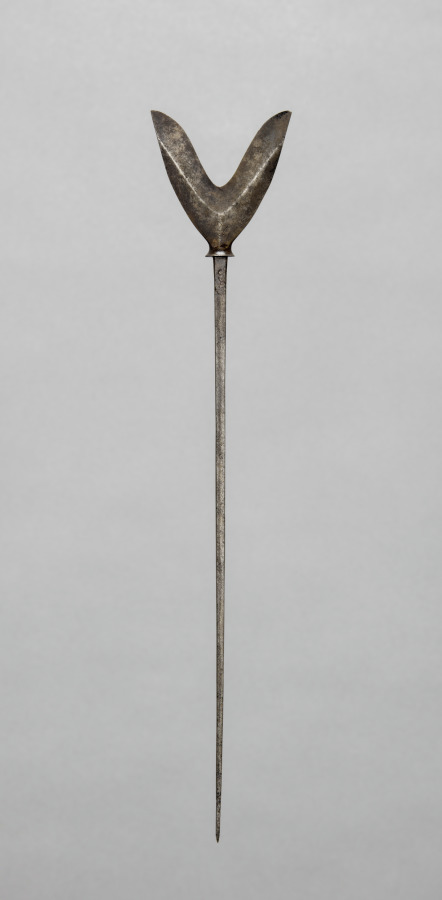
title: Arrow Point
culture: Japan, Edo period (1615–1868)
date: 1700s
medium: steel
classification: Arms and Armor